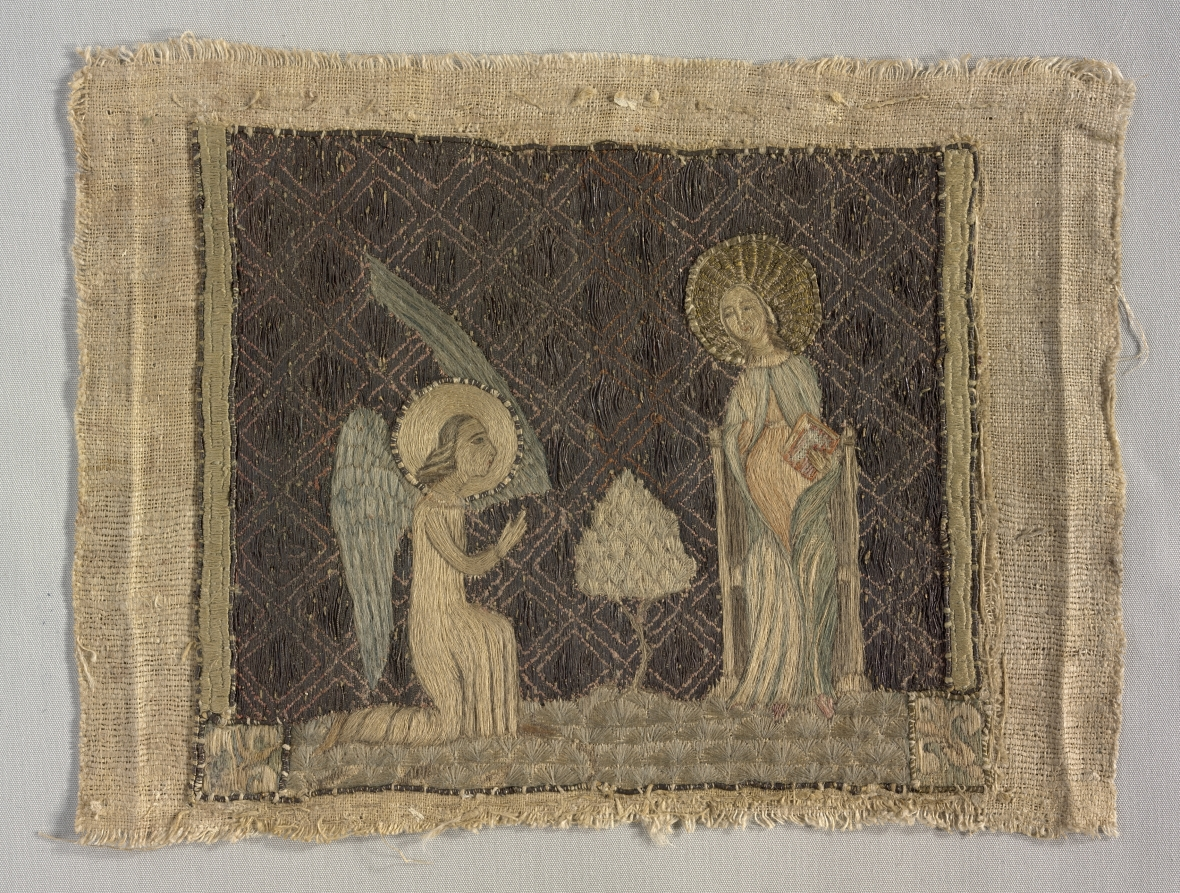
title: Embroidered Annunciation Scene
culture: Unassigned, 20th century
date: 20th century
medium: silver filé on plain weave linen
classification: Embroidery